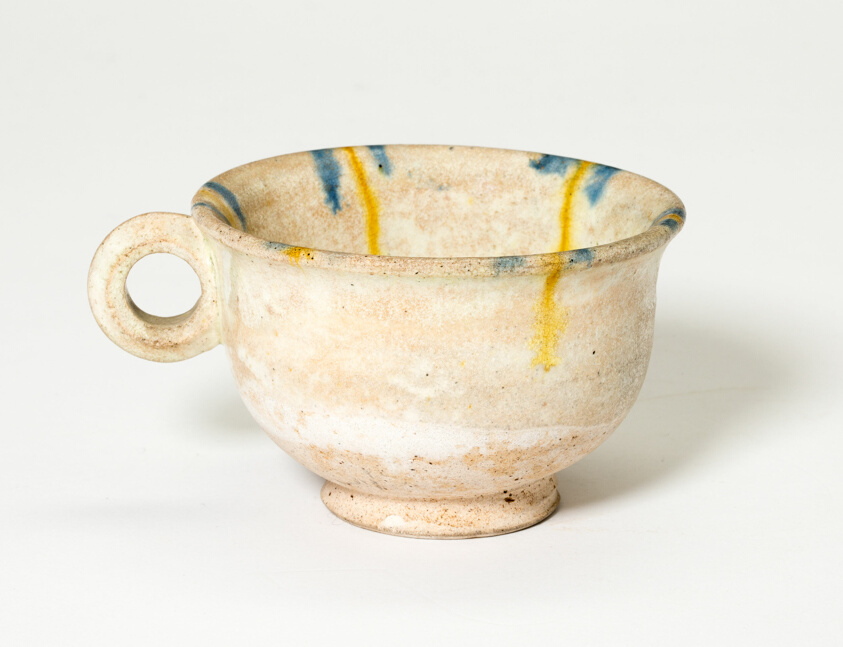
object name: Vessel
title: Ring-Handled Cup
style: Chinese (culture or style)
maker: China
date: Tang dynasty (618–906)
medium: Slip-coated earthenware with cobalt blue and lead yellow streaks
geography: China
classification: drinking vessel; asian art; ceramics; vessel